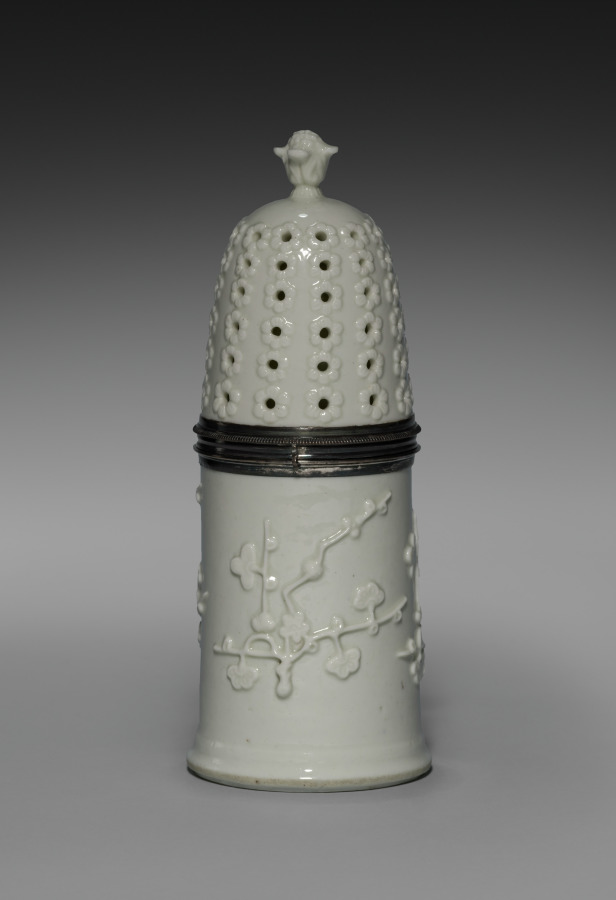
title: Caster (Saupoudreuse)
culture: France, Saint Cloud, 18th century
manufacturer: Saint Cloud Porcelain Factory (French)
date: c. 1732–38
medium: soft-paste porcelain, silver mount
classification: Ceramic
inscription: [Discharge mark of Hubert Louvet, 1732-1738 (Dog's head in profile), on both sections of silver mount]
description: This cylindrical caster with a removable pierced cover may have held sugar. It likely derives its form from silver casters manufactured pre-1700. Its all-white, molded, prunus branch decorations are characteristic of blanc de chine, the term used in France to reference the highly prized porcelain produced in the southeastern Fujian province of Dehua, China, known for its pure color and high degree of translucence.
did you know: Prunus branches, which refer to flowering trees and shrubs including plums, cherries, peaches, nectarines, apricots, and almonds, were a common motif in Chinese porcelain.